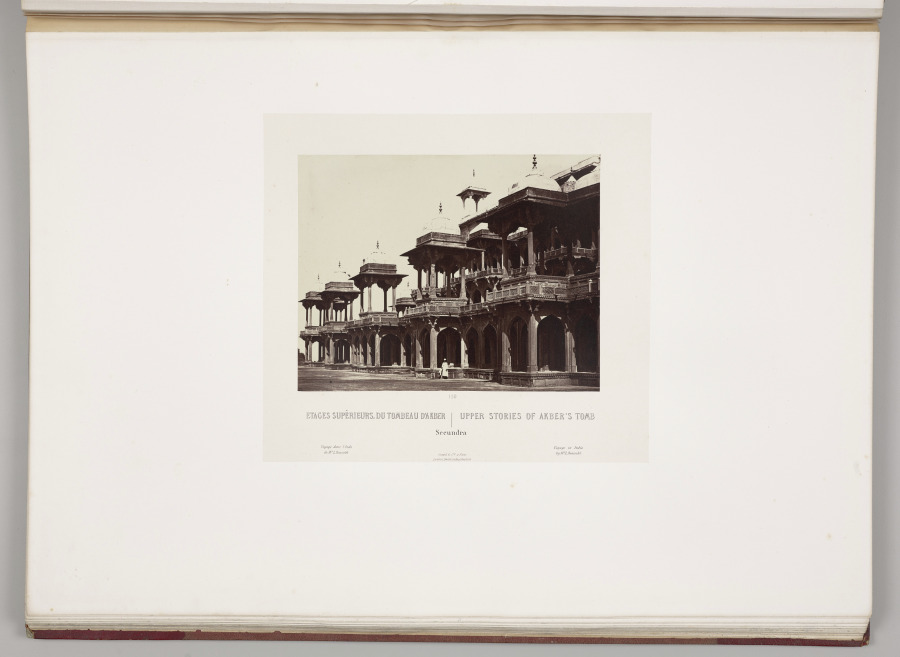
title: Upper Stories of Akber's Tomb, Secundra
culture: France, 19th century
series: India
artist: Louis-Théophile Marie Rousselet (French, 1845–1929)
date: 1865–68, published 1869–70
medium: Albumen print from glass plate negative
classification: Photograph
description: Concerned that his drawings did not do justice to the splendor of India’s monuments, Rousselet learned photography in India that year, a remarkable accomplishment. He proved to be a talented photographer with a sophisticated sense of composition. The scenes in this volume sweep across sites of Sultanate, Rajput, and Mughal power in northern India, from the sacred Hindu city of Varanasi on the Ganges River to Alwar in Rajasthan. Also included are several scenes of industry and portraits of Indian rulers.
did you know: Louis Rousselet described himself as a “scientific traveler” when he went to India alone at age 18 in 1863 and stayed into 1868.